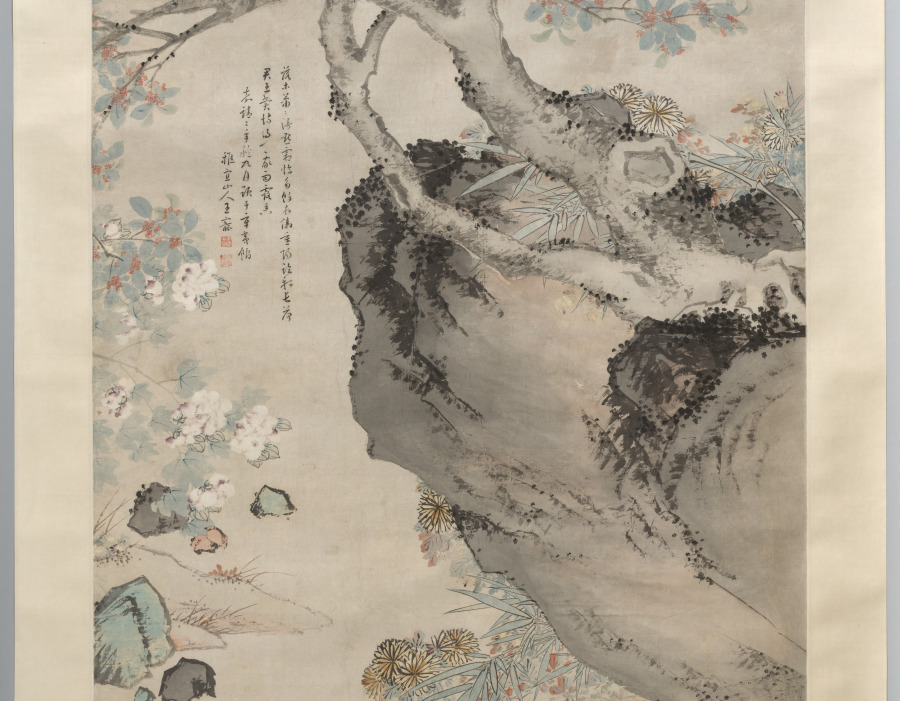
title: Yellow Chrysanthemums and Red Osmanthus in the Style of Wang Yuan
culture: China, Ming dynasty (1368–1644)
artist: Shen Zhou (Chinese, 1427–1509)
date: 1468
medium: hanging scroll, ink on paper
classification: Painting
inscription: Artist's inscription, signature, and 2 seals at upper right: Beneath the fence yellow [chrysanthemum] flowers brave the rain to blossom;/ Still others lean on the red osmanthus tree and dazzle the deep green moss./ With a goblet [of wine] I face them, entirely without concern;/ Who will answer the knocking at the gate where a guest has arrived? In the ninth month of the fourth year of the Chenghua era [1468], I followed the brush-conception of Wang Danxuan 王澹軒 [Wang Yuan 王淵] at the Youzhuzhuang 有竹庄 [House with Bamboo]. Inscribed and [painted] by Shen Zhou 沈周 of Changzhou 長洲. [seals] Shitian 石田; Shen shi Qinan 沈氏启南. trans. HR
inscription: 1 additional inscription, dated 1523, and 2 seals of Wang Chong 王寵 (1494-1533).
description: Shen Zhou, a native from Suzhou, was descended from a prominent land-owning family with strong ties to literati culture. Because Shen Zhou never entered government service, he had ample opportunity to cultivate the arts of painting, poetry, and calligraphy. Chrysanthemums and red osmanthus both bloom in autumn. The deep orange osmanthus flowers emanate a characteristically sweet fragrance. According to his inscription on the painting, Shen Zhou sought to imitate the style of the Yuan dynasty (1271–1368) painter Wang Yuan. His color-filled brushstrokes and washes, however, anticipate the flower painting style of Yun Shouping, whose Peonies are also in the Cleveland Museum of Art collection, https://www.clevelandart.org/art/1967.192. The sheer size and complex composition of this scroll are impressive.